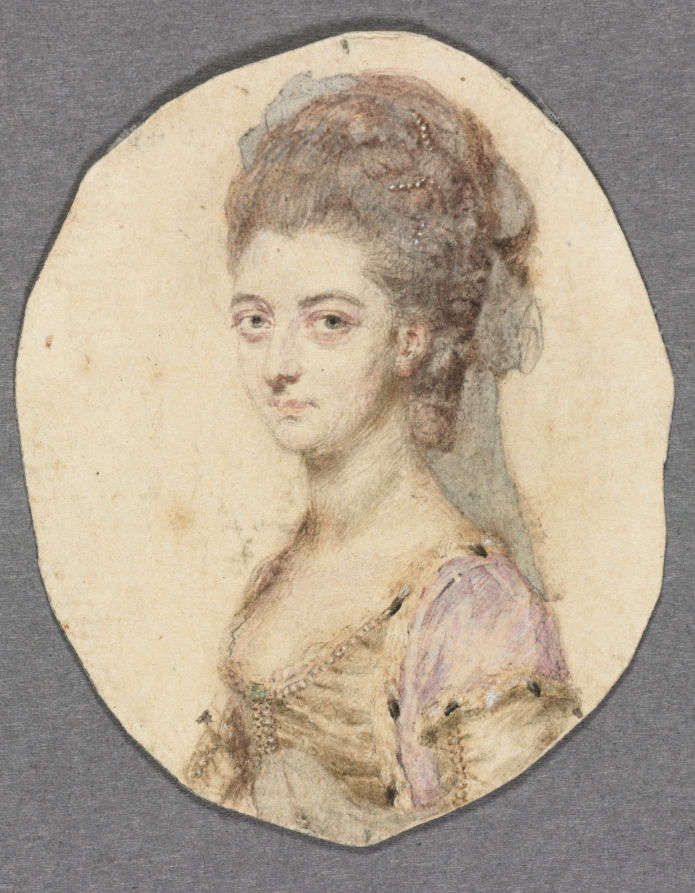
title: Portrait of Charlotte Bertie, née Warren, 4th Countess of Abingdon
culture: England, 18th century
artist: John I Smart (British, 1741–1811)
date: 1778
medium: graphite and wash on laid paper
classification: Portrait Miniature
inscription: inscribed on verso of paper to top in brown ink: [L]ady Abingto[n] 1778; inscribed at bottom of verso in graphite: J Smart / Lady Abington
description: Although it is impossible to say if it was always part of the artist’s process to execute a preparatory sketch prior to painting each miniature, we do know that John Smart retained many hundreds of these sketches. A group of preparatory sketches—of which this portrait is one—descended through the Smirke family after Smart’s daughter Sarah gave a sketchbook containing preparatory portrait studies to her friend Mary Smirke, sister of the celebrated Victorian architect Sydney Smirke. This book was probably broken up around 1877 when it was divided between Sydney’s daughters Mary Jemmett and Mrs. Lange, whose portions were both sold at auction in 1928. G. C. Williamson was the first to suggest that Smart’s sketches were well known and that they were preparatory studies for the painted miniatures. Williamson listed the names of sitters from the sketches known to him at the time, and they included Lady Abingdon. Here, Lady Abingdon’s head and shoulders face right. Her brown hair is dressed high on her head, and a strand of pearls is woven through the left side of her coiffure. A veil descends from the top of her head, past her shoulders. She has gray eyes. Compared to his contemporaries George Engleheart (1752–1829) and Andrew Plimer (1763–1837), whose female sitters were often painted in similar simple white gowns, Smart often lavished more attention on the costumes in his portraits of women, whose dresses incorporated colored silks, printed fabrics, and luxury trimmings like lace and fur. Thus, Lady Abingdon wears a low-necked, pink dress trimmed with ermine and strands of pearls. The background is unpainted. The removal of the paper backing revealed an inscription in brown ink, written in Smart’s hand, dating the work and verifying the identity of the sitter as Lady Abingdon. Lady Abingdon (d. 1799) was the daughter of Admiral Sir Peter Warren, K.B., M.P. She married Willoughby Bertie, 4th Earl of Abingdon, in 1768. They had six children, two of whom died very young. It is for Lady Abingdon that Abingdon Square in New York City is named, courtesy of her father, who had purchased 300 acres of land in Greenwich Village in 1744. Her husband’s famous protestations against the British government’s treatment of America during the War for Independence ensured that even in 1794, when the New York city council was rooting out British names from public streets and spaces, the name of Abingdon Square was retained. The family was painted by some of the great artists of the day, including Nathaniel Dance-Holland (1735–1811) and John Francis Rigaud (1742–1810). The formal portrait of 1769 by Dance-Holland, in which Lady Abingdon is depicted in coronation robes and holding her peeress’s coronet, conveys the pomp and tradition expected from a marriage portrait of a powerful peer. But even Smart’s miniature portrait sketch of almost a decade later maintains some of this grandeur, depicting the countess with aristocratic bearing and wearing the rich ermine-trimmed gown to which her station entitled her. A miniature on ivory corresponds to this preparatory sketch, although it is dated 1777, suggesting that the sketch may have been executed the following year in preparation for a second version of the portrait. There are slight differences in the details of the dress, particularly the left sleeve—which has been lengthened—and a slight reduction in pearl and ermine trim. The portrait on ivory also has somewhat more softness in the facial features, but many of the details, including the veil and the lock of hair on the right shoulder, are extremely similar. The miniature’s current location is unknown.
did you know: Sketches helped John Smart work out the particulars of a portrait before commencing the miniature on ivory, and they were useful in the event that a duplicate might later be required.